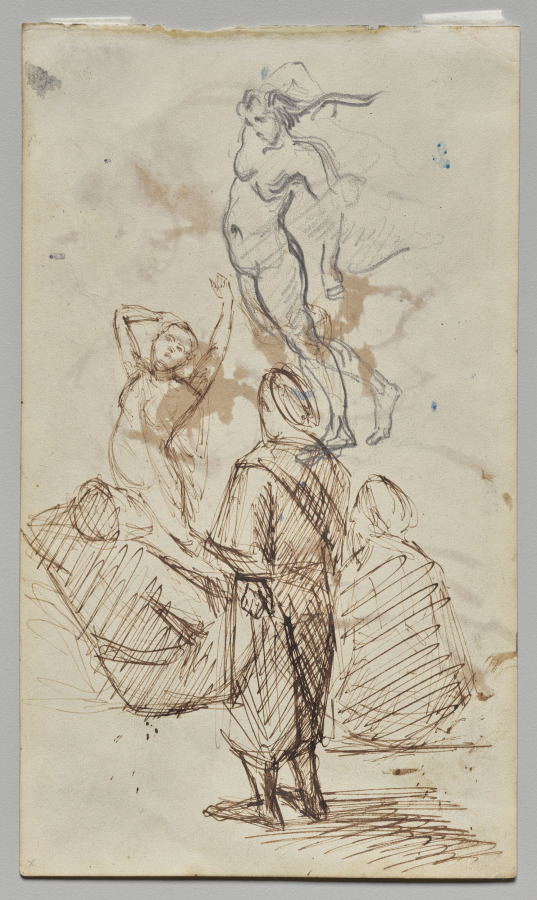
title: Sheet of Studies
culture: France, 19th century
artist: Paul Cezanne (French, 1839–1906)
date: 1871–76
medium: graphite and pen and brown ink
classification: Drawing